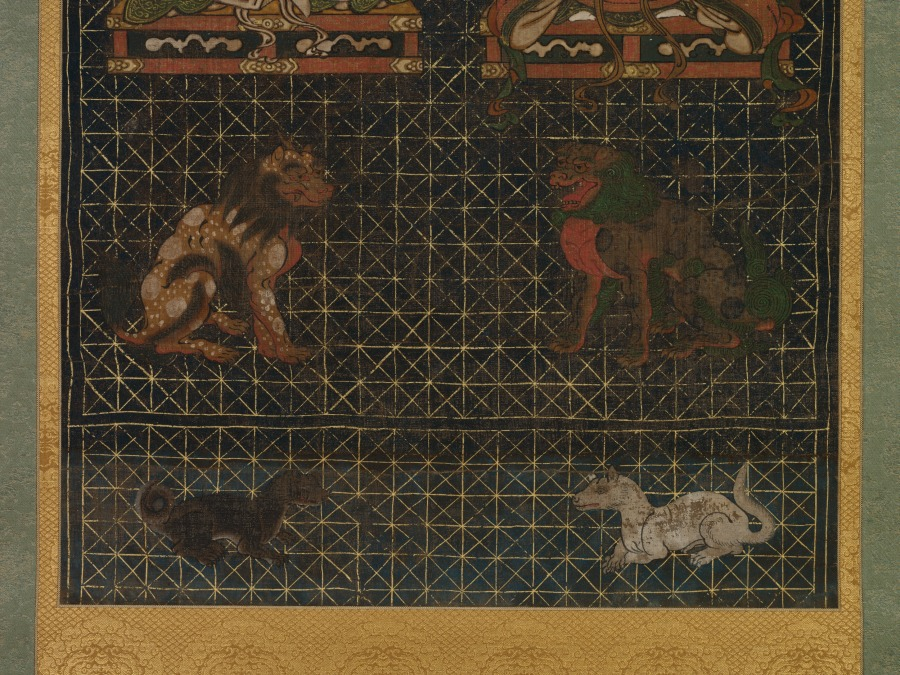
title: Mandala of the Four Deities of Mt. Kōya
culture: Japan, Muromachi period (1392–1573)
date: 1500s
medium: hanging scroll, ink, color and cut gold foil on silk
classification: Painting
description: The two kami, or deities, at the top of this painting are Kariba Myōjin and Niu Myōjin. They inhabit Mount Kōya and are described as son and mother. They are shown here as courtiers, with Kariba in Japanese-style court robes and Niu in robes modeled after court garments of the Tang dynasty. The two kami seated beneath are Kehi Myōjin, portrayed as a lady holding a whisk, and the youthful Miyajima Myōjin, with his hair drawn up in loops, playing a lute (biwa). Hōjō Masako (1157–1225), the wife of the first Kamakura shogun (leader) Minamoto Yoritomo (1147–1199), invited them to Mount Kōya.